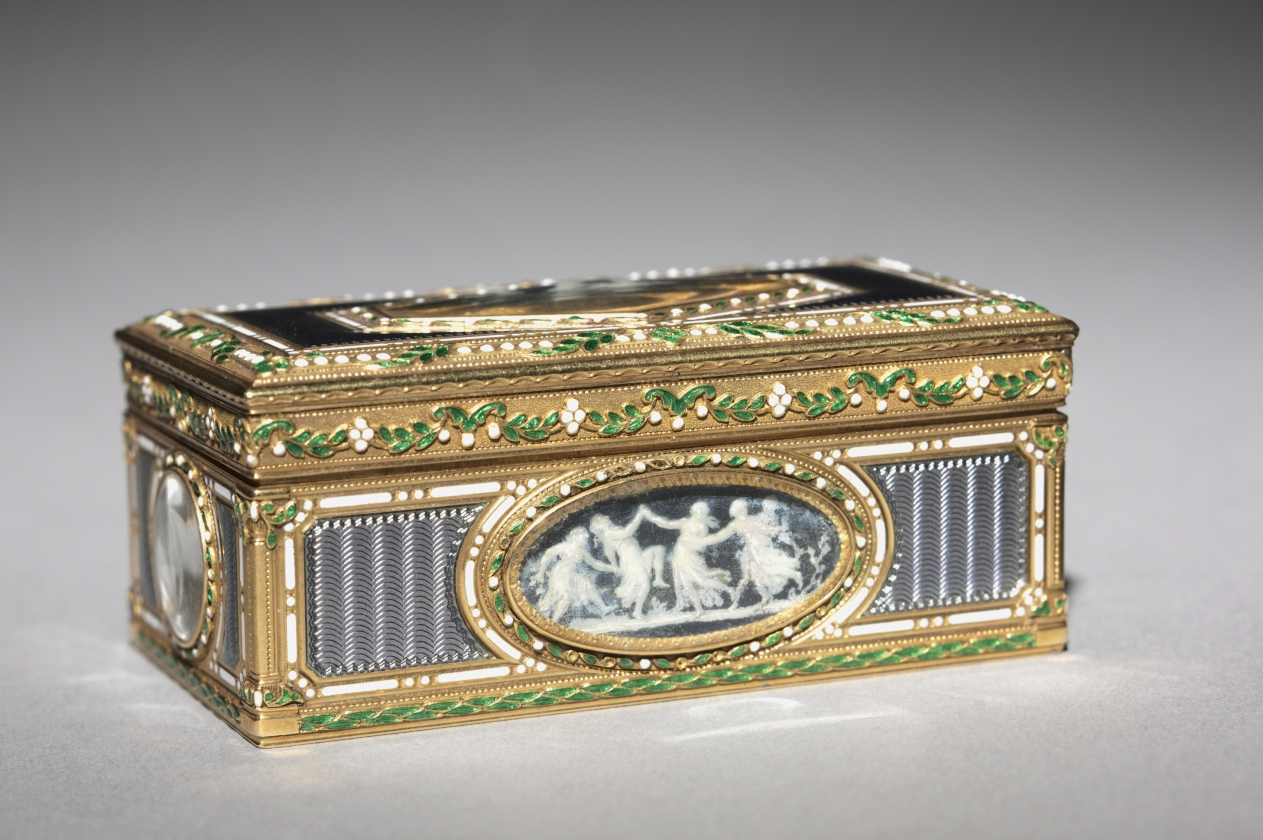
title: Snuff Box (Tabatière)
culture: France, 18th century (style of Louis XVI)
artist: François Chazeray (French)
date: 1777–78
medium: gold and enamel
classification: Metalwork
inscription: [Maker's mark of François Chazeray, master goldsmith in 1760, cover; bottom; front wall]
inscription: [Warden's mark (probably a crowned "O"), Paris, 1777-1778, cover; bottom; front wall]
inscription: [Illegible mark, bottom]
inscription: [Illegible mark, cover]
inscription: [Illegible charge mark, inside front]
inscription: [Discharge mark of Jean-Baptiste Fouache, Paris, 1774-1780, on neck at left.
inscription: [Outside of neck, modern inscription '4 (modern inscription]:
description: This box is decorated with figures of antiquity associated with love: winged cupids, dancing nymphs, and representations of the Greek goddess of love. These scenes are inspired by antique cameos, intricately carved gemstones crafted in ancient Greece and Rome. This interest in ancient iconography, symmetry, and classical compositions of gods and goddesses was characteristic of 18th-century neoclassicism.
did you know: Decorated with allegorical scenes of love, it is likely that this box was a present between lovers.